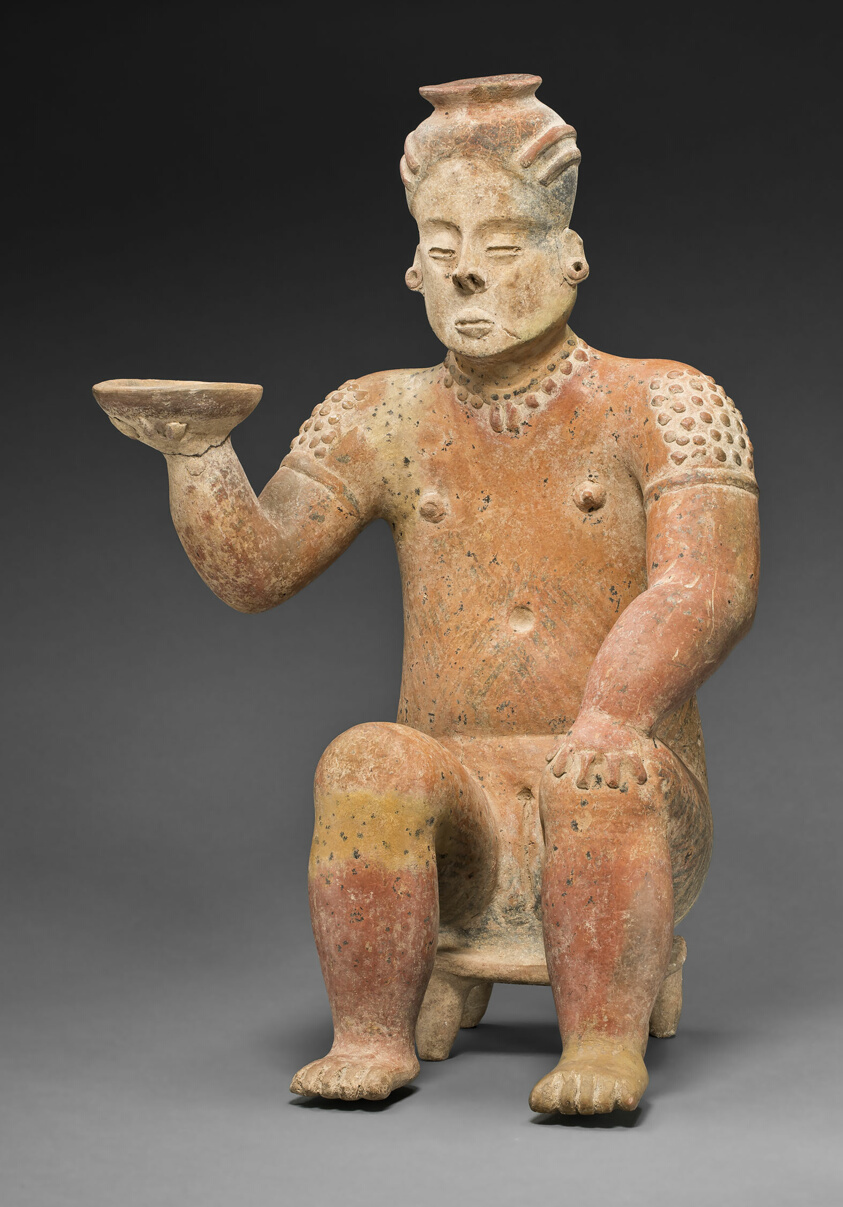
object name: Sculpture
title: Seated Female Figure Holding a Bowl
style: colima, mesoamerican, Pre-Columbian, americas, west mexico, Arts of the Americas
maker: Colima (Colima, Mexico)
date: 100–800 CE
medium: Ceramic and pigment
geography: Western Mexico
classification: earthenware; ceramics; sculpture; art of the americas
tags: people, female, offering, ancestors